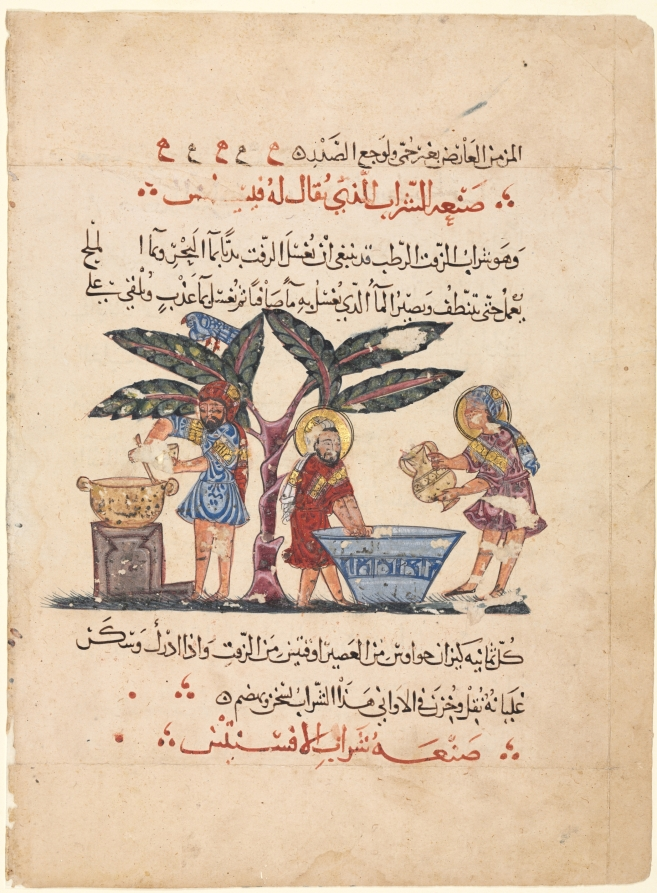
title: Three physicians preparing medicine, from an Arabic translation of the Materia Medica of Dioscorides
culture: Iraq, Baghdad, Abbasid Period, 13th Century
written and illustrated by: Abdallah ibn al-Fadl (Iraq)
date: 1224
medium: ink, opaque watercolor, and gold on paper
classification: Manuscript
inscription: Script: Naskh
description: This page is from an herbal, an illustrated book on the properties of plants. Herbals were among the first manuscripts of the Islamic world to include painted figural imagery. The lines in red are titles signaling how to make a particular kind of medicine. Initially written in Greek by a physician working for the Roman imperial army in what is present-day Turkey during the 1st century AD, the text was translated into Arabic during the 800s for a caliph who sponsored many translations of Greek scientific and philosophical treatises. This copy entered the royal Topkapi Palace library in Istanbul, from where 33 of its illustrated pages were dispersed to various collections. The first recipe on the text page describes the production of a syrup used for coughs, chronic diarrhea, and the treatment of syphilis in women. It states that the herb wormwood should be added to give it a more pleasant smell. The second recipe is for a syrup made from pine nuts, and the third is used to relieve chest pains and coughing without fever. The painting on the reverse depicts a physician in red and his two assistants preparing a medicinal syrup thought to be good for digestion. In accordance with the instructions on the page, tar in the consistency of dough is to be washed in salt water, then plain water. The artist has shown the washing taking place in a great basin. The syrup is then boiled, as seen on the left, and ladled into a bowl for storage.